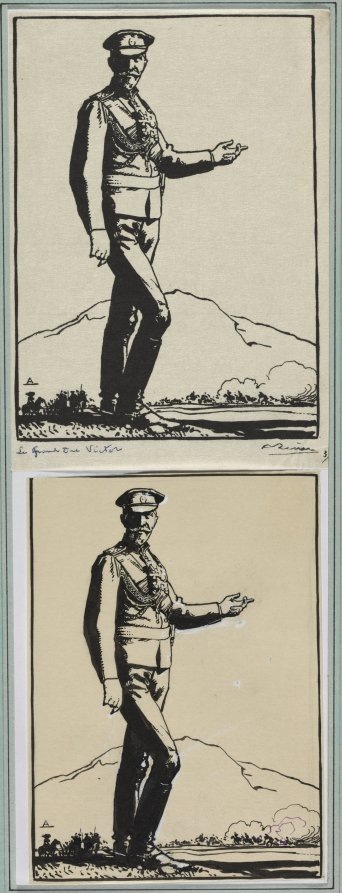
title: Le Grand Duc Victor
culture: France, 20th century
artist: Auguste Louis Lepère (French, 1849–1918)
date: 1914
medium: brush and black ink over pencil with white highlights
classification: Drawing